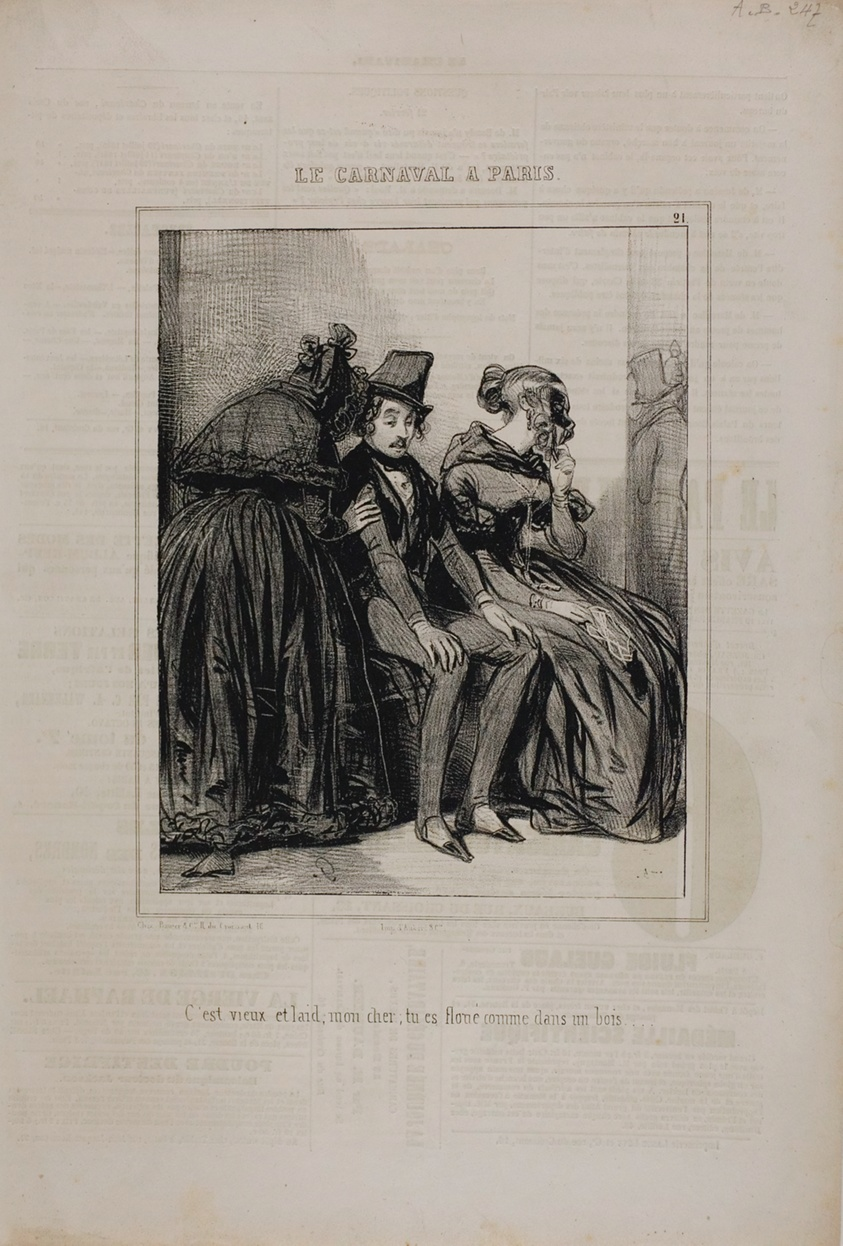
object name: Print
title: It is Old and Ugly..., from Le Carnaval à Paris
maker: Paul Gavarni (French, 1804-1866)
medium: Lithograph on discolored ivory wove paper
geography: France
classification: lithograph; print; prints and drawing